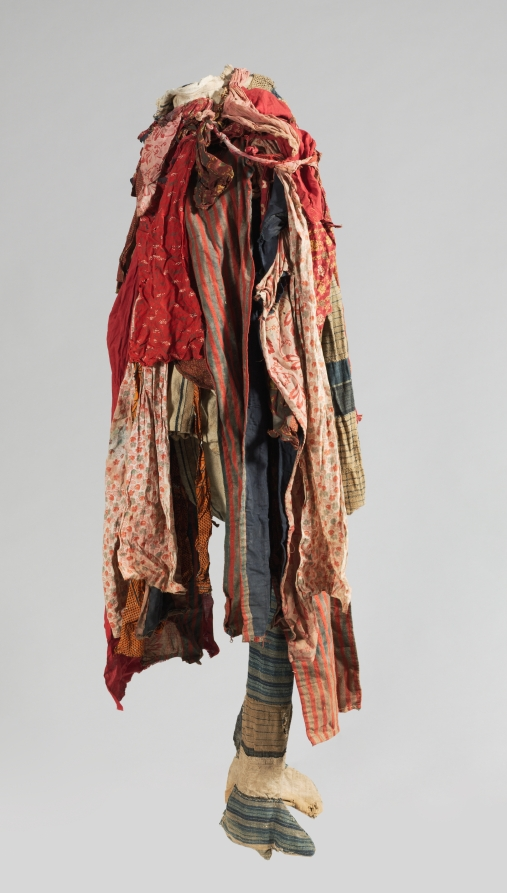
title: Egúngún Masquerade Dance Costume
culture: Africa, West Africa, Nigeria, Yorùbá-style maker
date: 1900s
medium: cotton, velvet, flannel, dye, faux fur, leather, cowrie shells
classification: Mask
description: Swirling into motion, egúngún masquerade costumes appear during annual festivities to bless the community. Manifesting ancestral spirits, they serve as a bridge between the living and the otherworld. The fabric panels create a dwelling place for ancestral spirits. Arranged and selected according to Yorùbá design sense (ojú-ọnà), this mask incorporates hundreds of African, Asian, and European fabrics. These include imported damasks, velvets, faux furs, and embroideries, as well as local indigo-dyed cottons.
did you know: The striped netting on the "face" of this masquerade costume allows the wearer to see out while keeping their identity concealed.